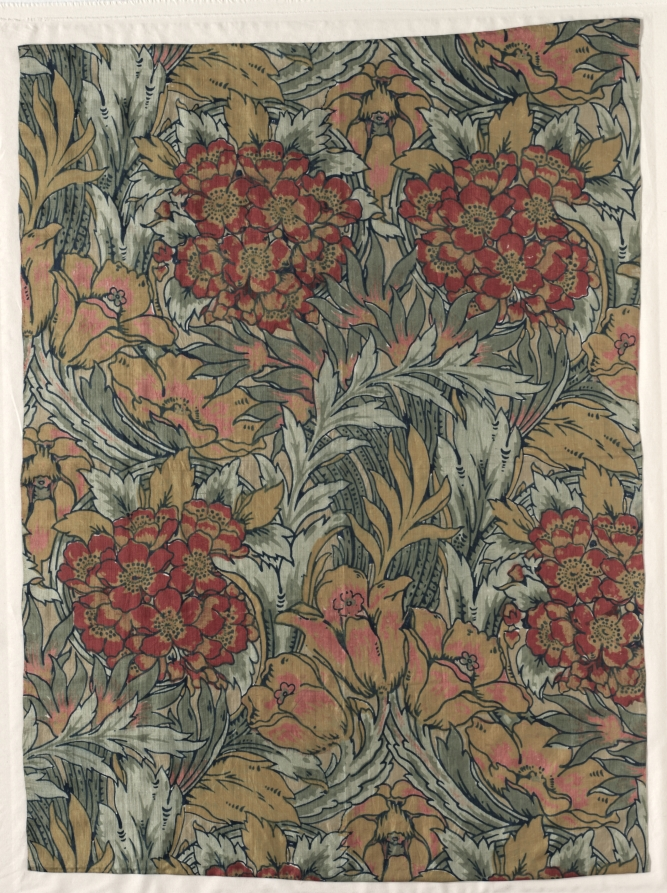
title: Fragment with Tulip and Flower Design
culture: England, 19th century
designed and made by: Liberty and Company (British)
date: 1890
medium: roller printed silk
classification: Textile